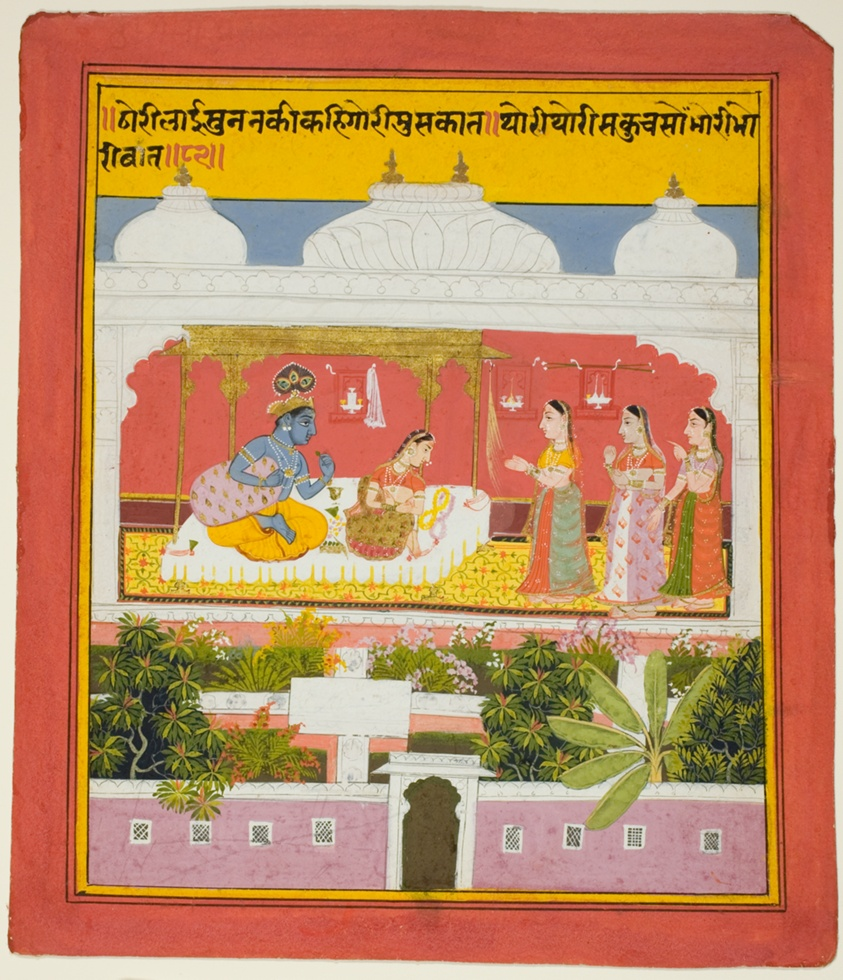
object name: Painting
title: Krishna and Radha in a Pavilion, from a copy of the Seven Hundred Verses (Sat Sai) of Bihari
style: South Asian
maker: India; Rajasthan, Mewar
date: 1719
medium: Opaque watercolor and gold on paper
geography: India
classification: miniature painting; painting; asian art